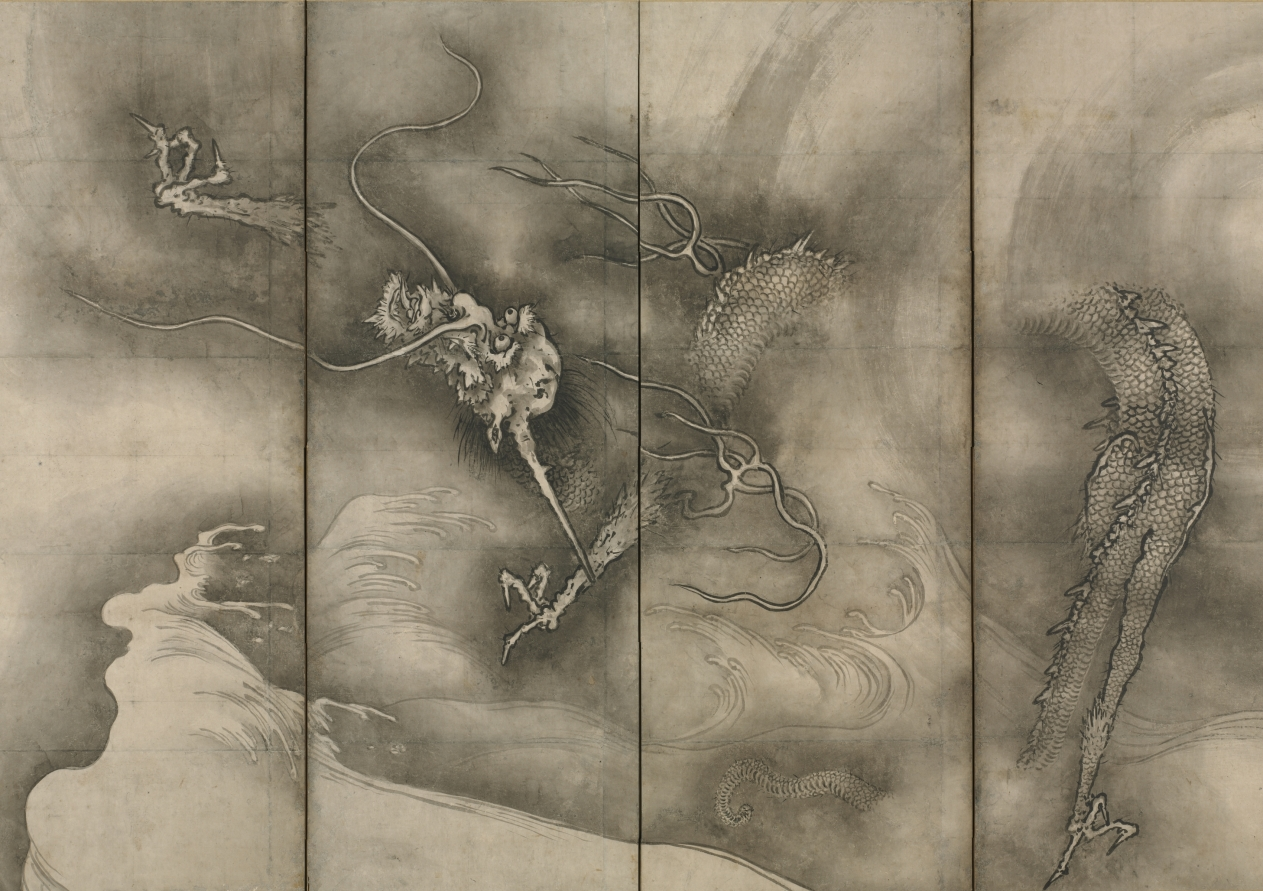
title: Dragon and Tiger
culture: Japan, Muromachi period (1392–1573) to Momoyama period (1573–1615)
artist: Sesson Shūkei (Japanese, c. 1492–c. 1577)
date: c. 1546–56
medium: One of a pair of six-panel folding screens; ink on paper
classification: Painting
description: In Chinese cosmology, dragons produce rain clouds. The dragon disappearing into and reemerging from clouds in this painting seems to generate rough waves in the water below, pulling it toward the sky. The shape of the foreground wave is indirectly sampled from a painting by 13th-century Chinese painter Yujian, a handscroll once owned by the Ashikaga military rulers of Japan. Sesson must have known the famous painting though copies, and made a copy of his own. Here, the wave reinforces the powerful quality of the dragon.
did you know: Sesson's dragon, winding in and out of clouds, may have taken inspiration from Chinese Ming-dynasty works in the style of 13th-century Chinese painter Chen Rong.